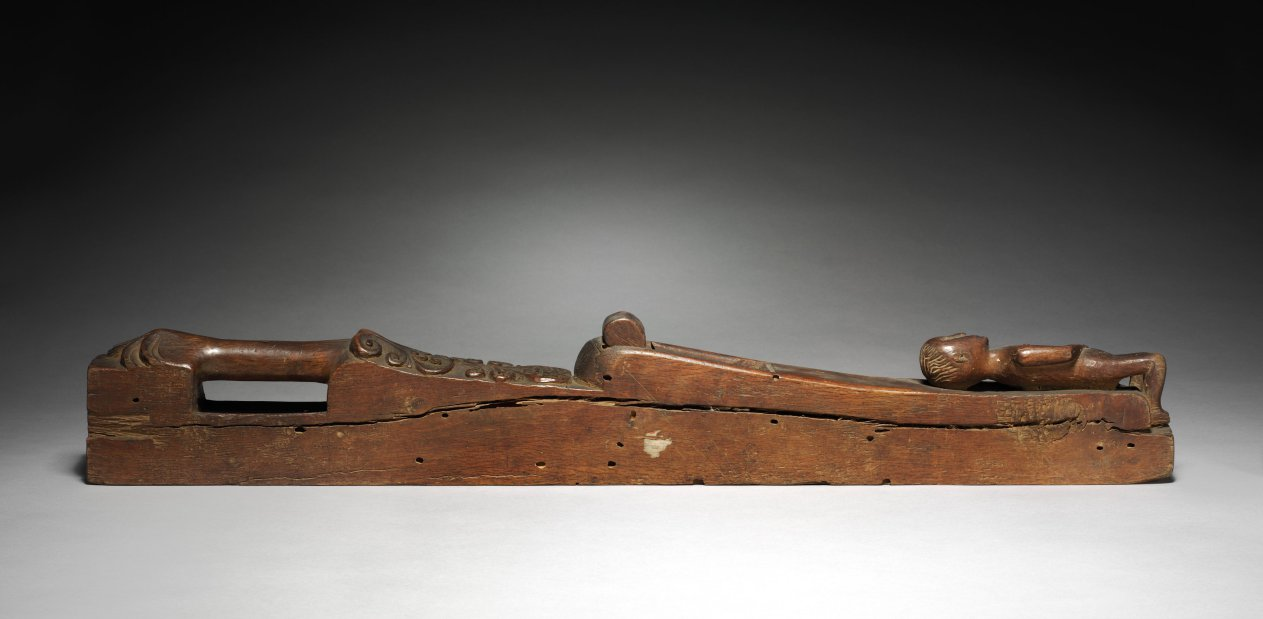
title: Plane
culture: Germany or Italy, 17th century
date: 1600s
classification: Tool